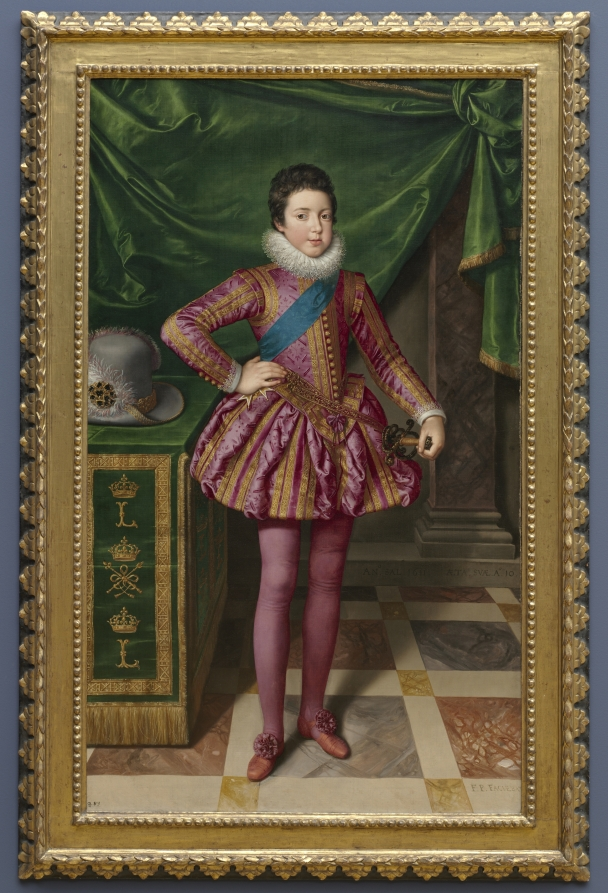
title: Portrait of King Louis XIII of France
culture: Flanders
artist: Frans Pourbus (Flemish, 1569–1622)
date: 1611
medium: oil on canvas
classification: Painting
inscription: Signed with the monogram lower right: F.P. FACIEBAT. Inscribed middle right: AN° SAL. 1611. AETA'. SVAE. A°. 10. Inscribed with inventory number lower left 783. Inscribed on the reverse, on a hand written label: brought back from Rome by J. W. Brigstocke of Carmarthen.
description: Although ten-year-old Louis XIII was king of France, his mother Marie de’ Medici remained in power until the boy officially came of age. Pourbus inscribed the sitter’s age and the painting’s year in the composition: “The holy year 1611 at his age of 10 years.” Marie de’ Medici commissioned this work as she negotiated marriages for her two children to Philip III of Spain and Mary Marguerite of Austria, alliances that led to the European domination of the next two centuries by the Bourbon and Habsburg families.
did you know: While the color pink has feminine associations now, it was commonly worn by girls and boys alike in the 1600s.